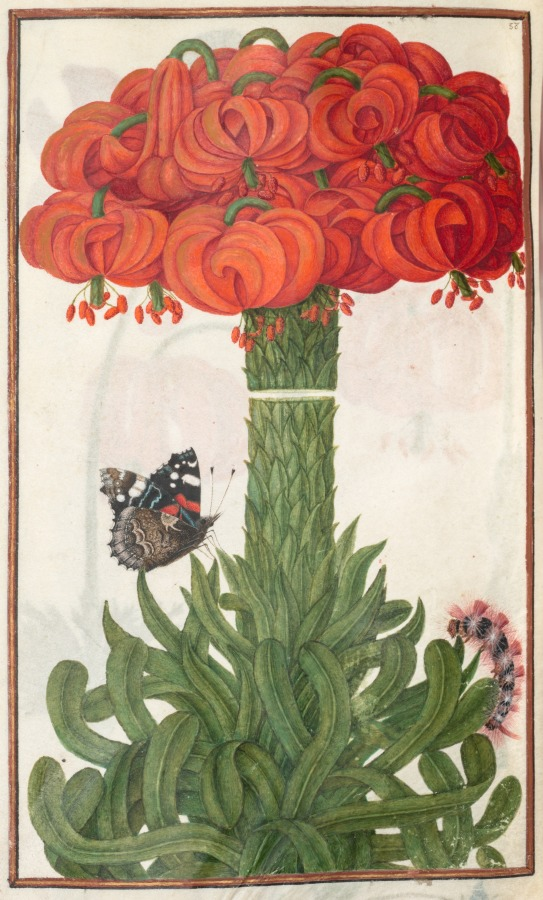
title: Bouquet of Orange Lilies, Moth, and Caterpillar, folio 19 (verso), from Florilegium (A Book of Flower Studies)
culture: France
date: 1608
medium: watercolor, ink, silver, and gold over occasional traces of pencil, on vellum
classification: Bound Volume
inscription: Dated: Poitiers 1608 (on frontispiece) Signed: On frontispiece in black ink, lower right: Van Kuyk Notation on drawing: Frontispiece: in pencil, lower margin: * élève de Van Kessel, peintre flammand (* in pencil also appears in front of Van Kuyk's name).